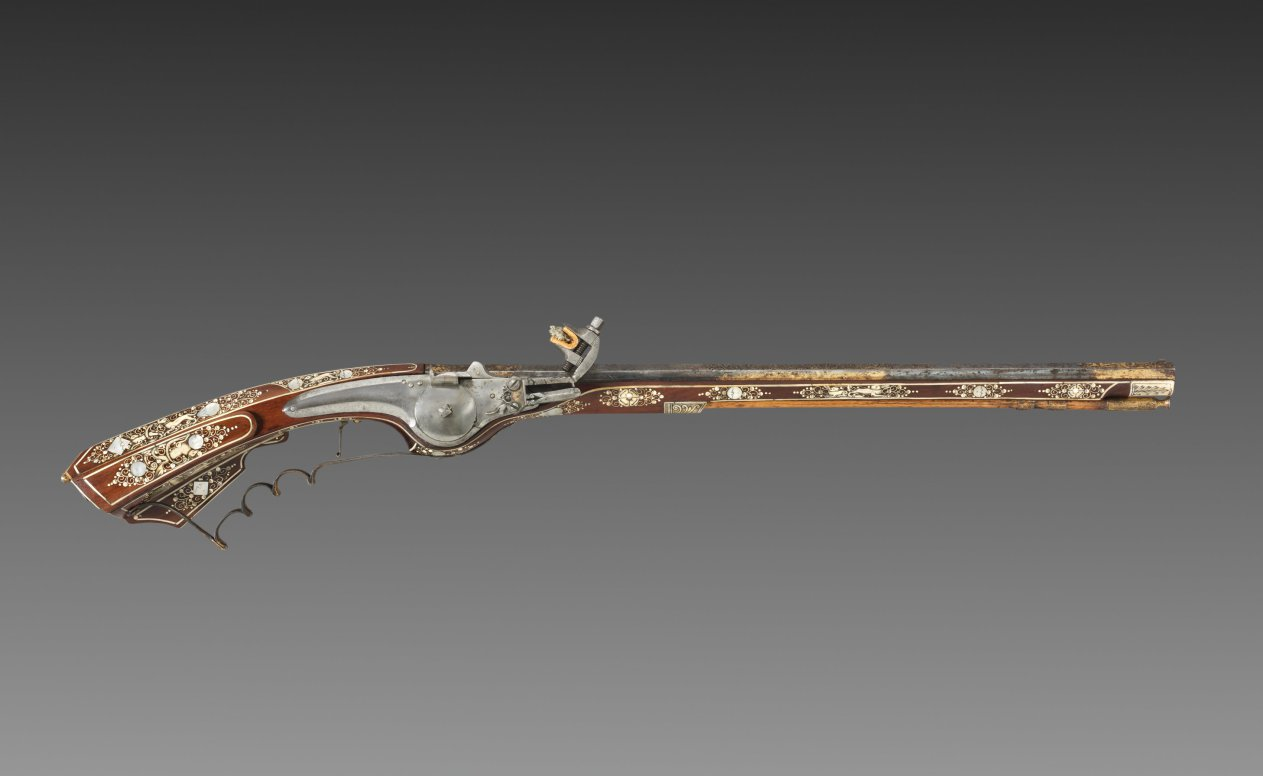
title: Wheel-lock Petronel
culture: Silesia (Southwestern Poland), Teschen, 17th century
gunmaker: Georg Kurland (Polish)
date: c. 1630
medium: steel, gilding, and wood inlaid with elk horn, ivory, and mother-of-pearl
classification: Arms and Armor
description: A petronel was a type of long pistol made with a wheel-lock ignition. Despite its length, the petronel was fired at the wrist like a pistol and not at the shoulder like a rifle. They were generally made in pairs during the early 1600s. Civilian versions were elaborately decorated for aristocratic clients.